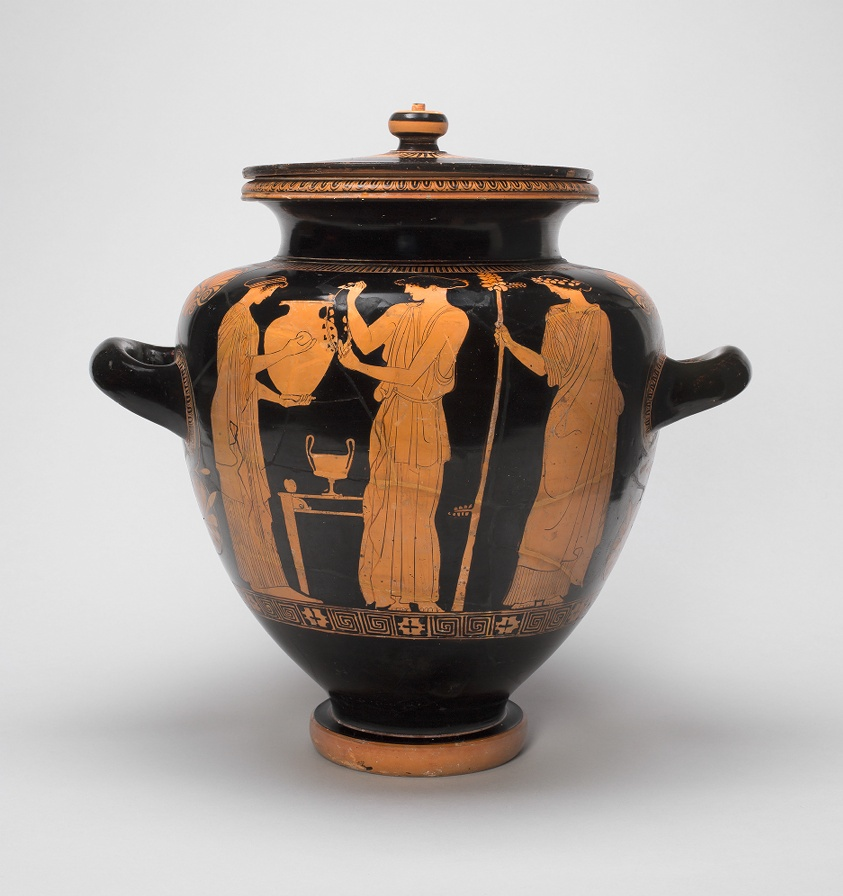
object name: Vessel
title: Stamnos (Mixing Jar)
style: high classical, Classical, attic, red-figure, ancient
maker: Attributed to the Chicago Painter; Greek; Athens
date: about 450 BCE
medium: terracotta, red-figure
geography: Athens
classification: vessel; earthenware; ceramics; ancient art; container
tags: drinking, dining, women, human figures, Greek, females, festivals, female figures, daily life, men, chairs, Greece, cups, interiors